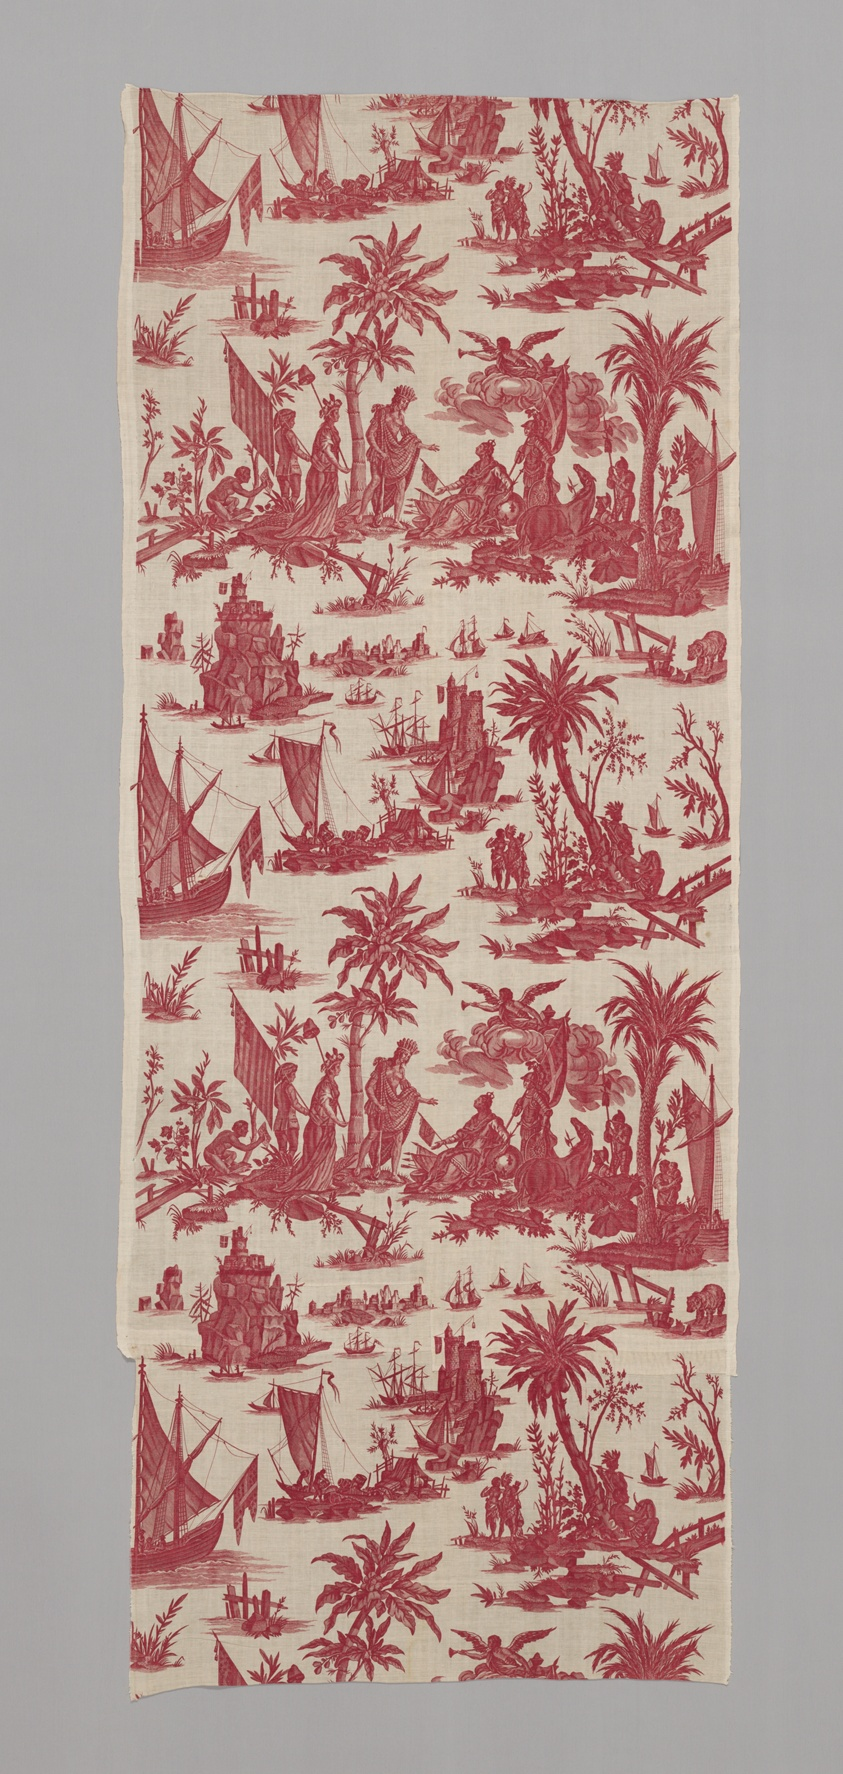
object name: Textile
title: L'Hommage de l'Amérique á la France (America's Tribute to France) (Furnishing Fabric)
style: jouy-en-Josas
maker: Design attributed to Jean Baptiste Huet (French, 1745–1811); Manufactured by Christophe-Philippe Oberkampf (naturalized French, 1738-1815), Oberkampf Manufactory (French, 1760-1843); Jouy-en-Josas, France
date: c. 1780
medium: Cotton, plain weave; copperplate printed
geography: Jouy-en-Josas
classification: weaving - printed; textile; furnishing textile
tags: red (color), angels, indigenous, plants, ships, white (color)